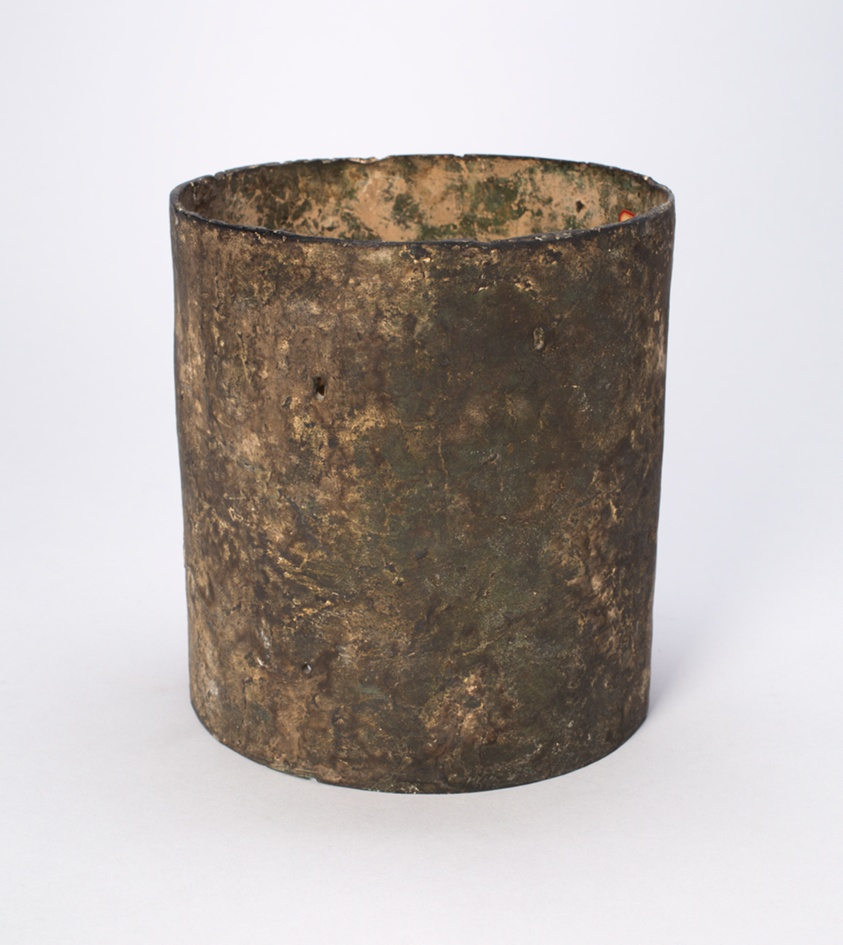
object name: Architectural fragment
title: Architectural Fitting (Gong)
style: Chinese (culture or style)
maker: China, Qishan county, Shaanxi province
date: Eastern Zhou dynasty, Spring and Autumn period (770–481 B.C.), 7th century B.C.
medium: Bronze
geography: China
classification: architectural fragment